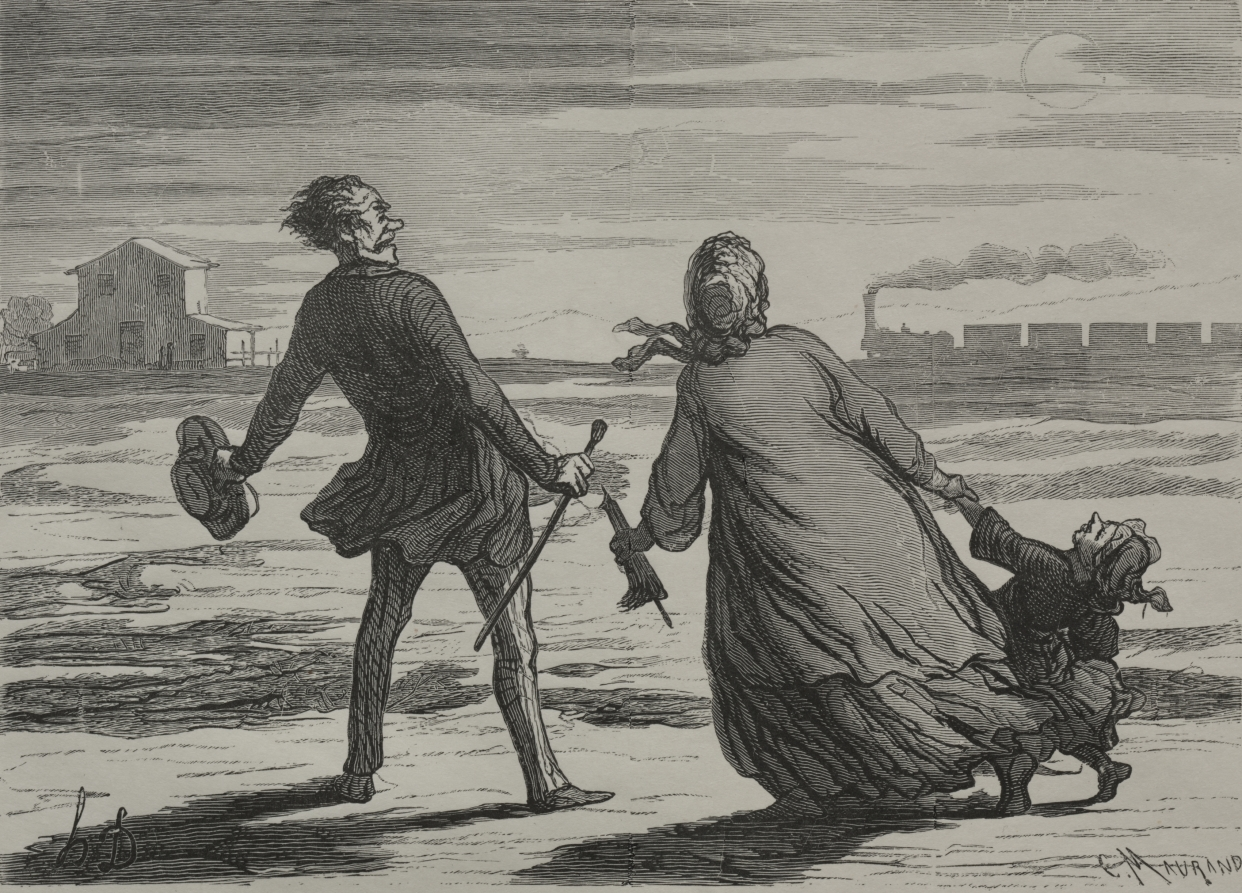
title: The Railway: Too Late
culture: France, 19th century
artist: Honoré Daumier (French, 1808–1879)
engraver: Charles Maurand (French, 1824–1904)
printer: François Louis Schmied (Swiss, 1873–1941)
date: 1862, printed 1920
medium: wood engraving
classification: Print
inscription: Lower margin, in pencil: 68/75 ; red stamp: FLS